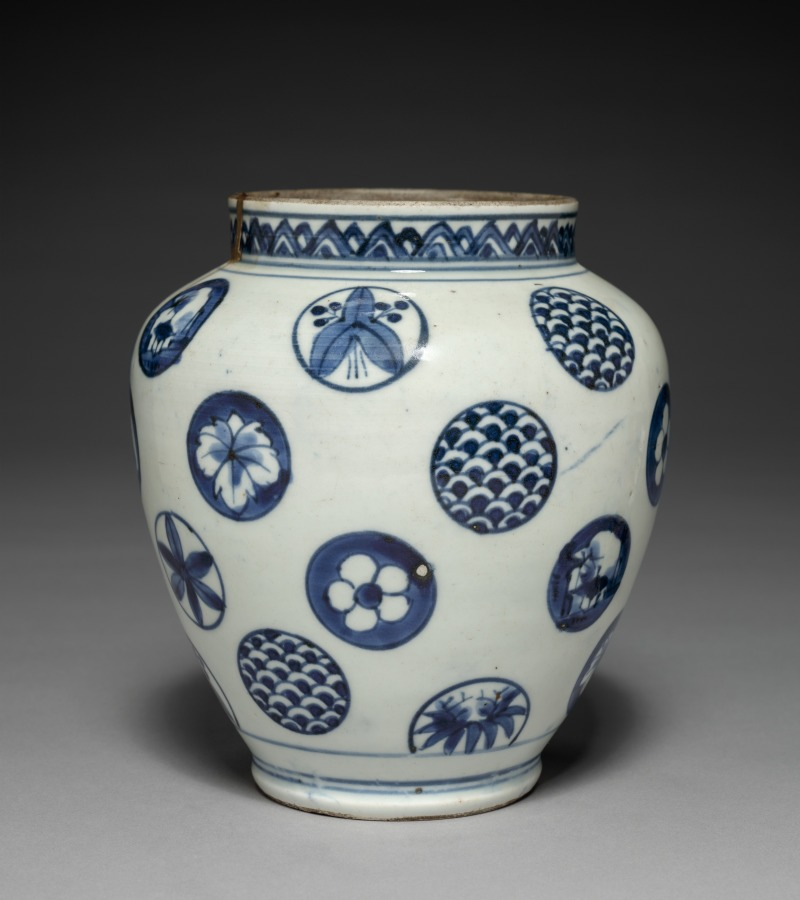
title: Jar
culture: Japan, Edo period (1615–1868)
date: early to mid-1800s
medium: porcelain with underglaze blue (Hizen ware, Arita type, Imari style)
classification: Ceramic